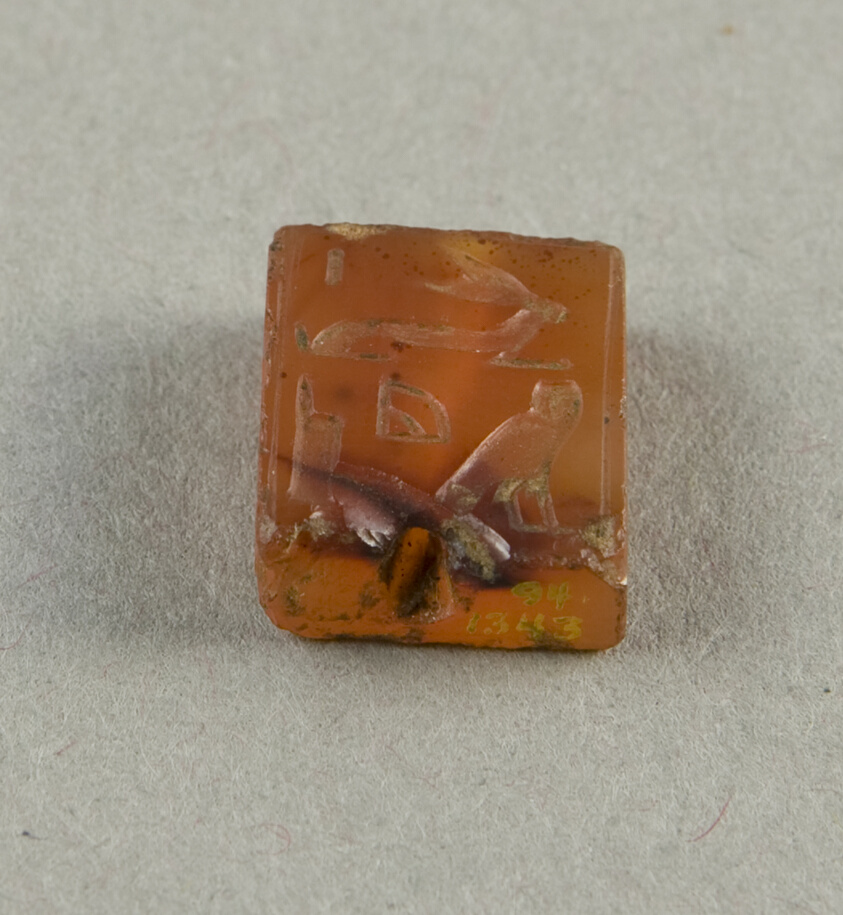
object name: Costume and Accessories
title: Plaque: “Amun is in Luxor”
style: egyptian, new kingdom, ancient, third intermediate period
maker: Egyptian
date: New Kingdom–Third Intermediate Period (?) Dynasties 18–25 (about 1550–664 BCE)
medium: Carnelian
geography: Egypt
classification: plaque (flat object); stone; amulet; ancient art; costume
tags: Hieroglyphs